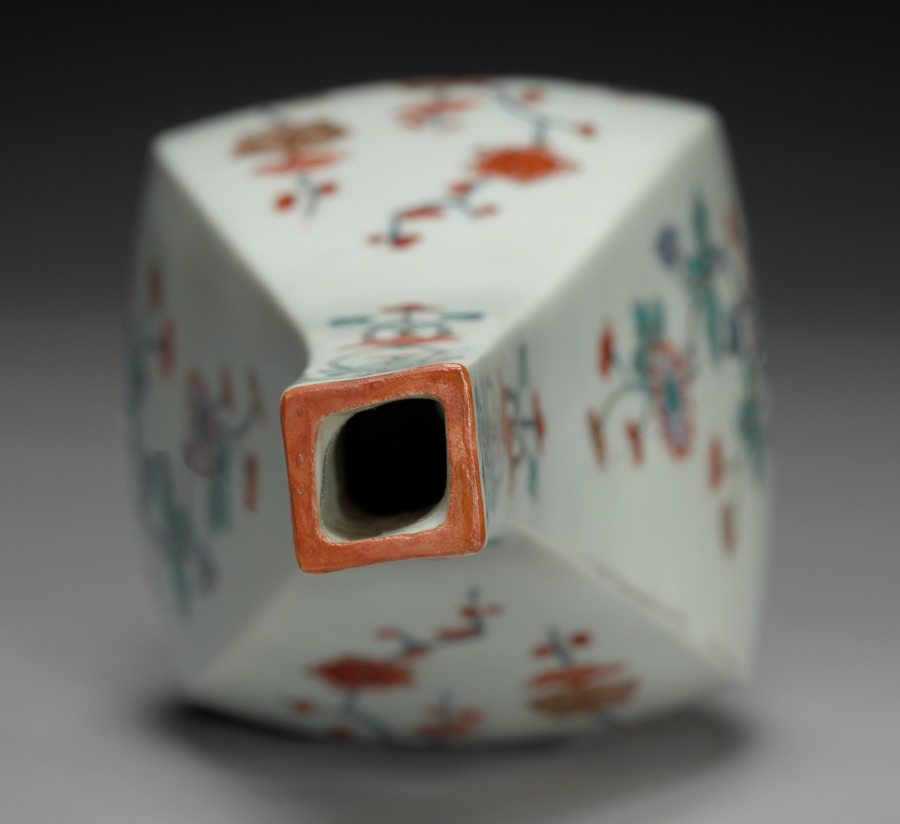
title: Bottle Vase with Plum and Chrysanthemum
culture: Japan, Edo period (1615–1868)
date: late 1600s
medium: porcelain with overglaze color enamel and gold (Hizen ware, Kakiemon type)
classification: Ceramic